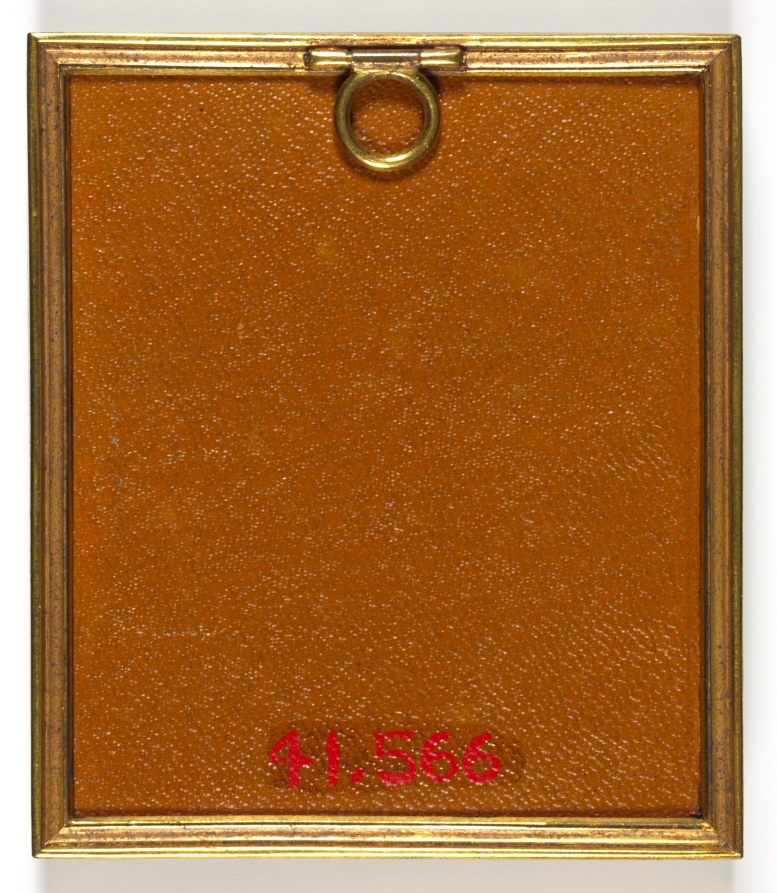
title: Portrait of Mr. Gambier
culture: England, 18th century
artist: John I Smart (British, 1741–1811)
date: c. 1776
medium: graphite and wash on laid paper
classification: Portrait Miniature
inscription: Signature: none; inscribed in graphite on front of paper at upper right corner: [?][?]2; inscribed on paper backing: in graphite, upside down at upper left: 15; in graphite, on a slant at left center to upper right: Mr. Fitzherbert; inscribed on back of paper in graphite: Mr. [Gambier]; inscribed in brown ink: Gambier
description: Although it is impossible to say if it was always part of the artist’s process to execute a preparatory sketch prior to painting each miniature, we do know that John Smart retained many hundreds of these sketches. A group of preparatory sketches—of which this portrait is one—descended through the Smirke family after Smart’s daughter Sarah gave a sketchbook containing preparatory portrait studies to her friend Mary Smirke, sister of the celebrated Victorian architect Sydney Smirke. This book was probably broken up around 1877 when it was divided between Sydney’s daughters Mary Jemmett and Mrs. Lange, whose portions were both sold at auction in 1928. G. C. Williamson was the first to suggest that Smart’s sketches were well known and that they were preparatory studies for the painted miniatures. Williamson listed the names of sitters from the sketches known to him at the time, and they include Mr. Fitzherbert, the identification formerly given to the sitter in this portrait. Here, the sitter’s head and shoulders are facing left. He has brown eyes and wears his powdered hair en queue. His coat has a narrow collar, under which he wears a high stock collar and frilled vest. The color of his attire is not suggested, and the background remains unpainted. Though long catalogued as Mr. Fitzherbert, the portrait was likely mistakenly designated as such at a later date. There has been confusion regarding several miniatures called Mr. Fitzherbert, which may or may not be related. There was a sketch of a different Mr. Fitzherbert in the Jemmett sale of February 29, 1928; another in the Burton-Jones collection by the 1940s; and a miniature of a Mr. Fitzherbert portrayed nearly full face and dated 1771 was sold at Sotheby’s, London, on August 1, 1934 (lot 73). The present location of these unpublished miniatures is unknown, as is their credibility as portraits of the Mr. Fitzherbert that Smart is known to have painted. When the paper backing of the Cleveland miniature was removed in 1993, the name Gambier was discovered inscribed in graphite and pen on the back. This miniature relates to a portrait of a man on ivory dated 1774, formerly in the Ashcroft collection and at one time on loan to the Victoria and Albert Museum. It was sold at Sotheby’s, London, on May 7,1946 (lot 61) and catalogued as a “miniature of a young man, by John Smart, signed and dated, head and shoulders three-quarters sinister, gaze directed at spectator, fair hair en queue, in white cravat, frilled vest and rich red coat, 1 3/8 in.” The size of the portraits correspond, though the ivory miniature represents less of the figure than is seen in the sketch and is therefore smaller. While the color red for the coat is not indicated in the sketch, Smart often left the dress of his male sitters plain in preparatory sketches. Thus, this currently unlocated miniature on ivory can be identified as Mr. Gambier. Research into the identity of this gentleman is ongoing.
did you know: Sketches helped John Smart work out the particulars of a portrait before commencing the miniature on ivory; they were useful in the event that a duplicate might later be required.